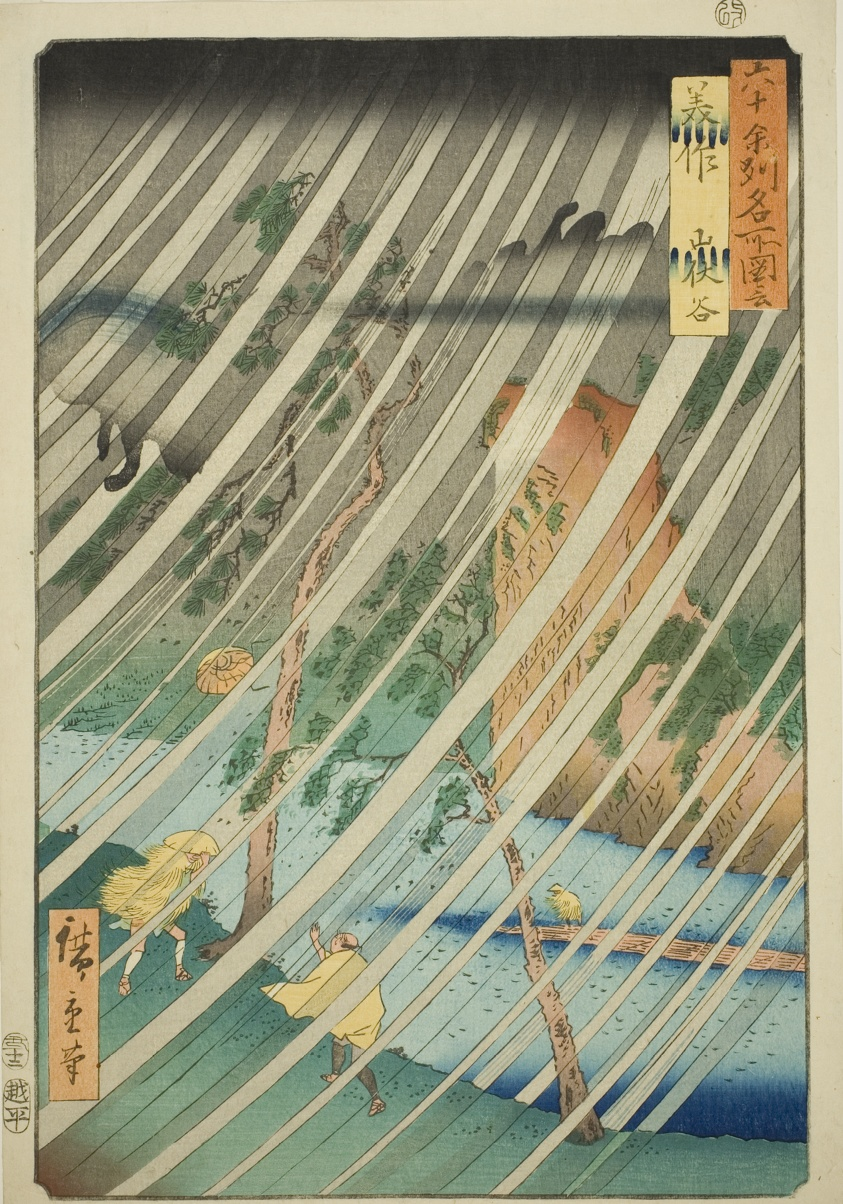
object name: Print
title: Mimasaka Province: Yamabushi Valley (Mimasaka, Yamabushidani), from the series "Famous Places in the Sixty-odd Provinces (Rokujuyoshu meisho zue)"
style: Japanese (culture or style)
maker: Utagawa Hiroshige 歌川 広重; Japanese, 1797-1858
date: 1853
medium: Color woodblock print; oban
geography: Japan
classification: woodblock print; print; asian art